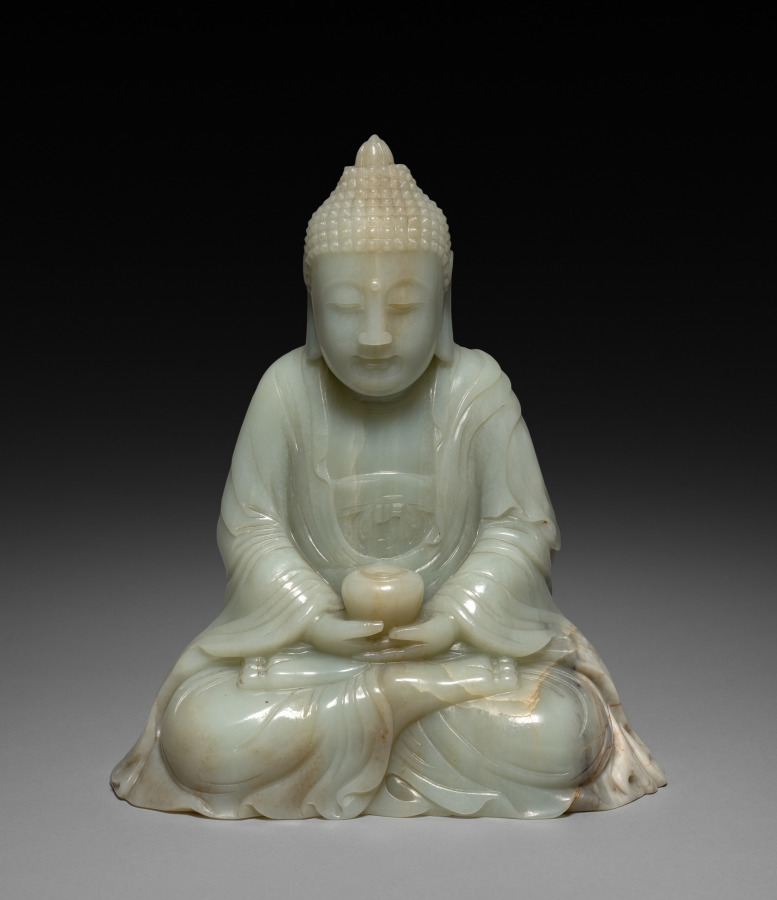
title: Seated Buddha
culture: China, Qing dynasty (1644-1911)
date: 1700s–1800s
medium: jade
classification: Jade